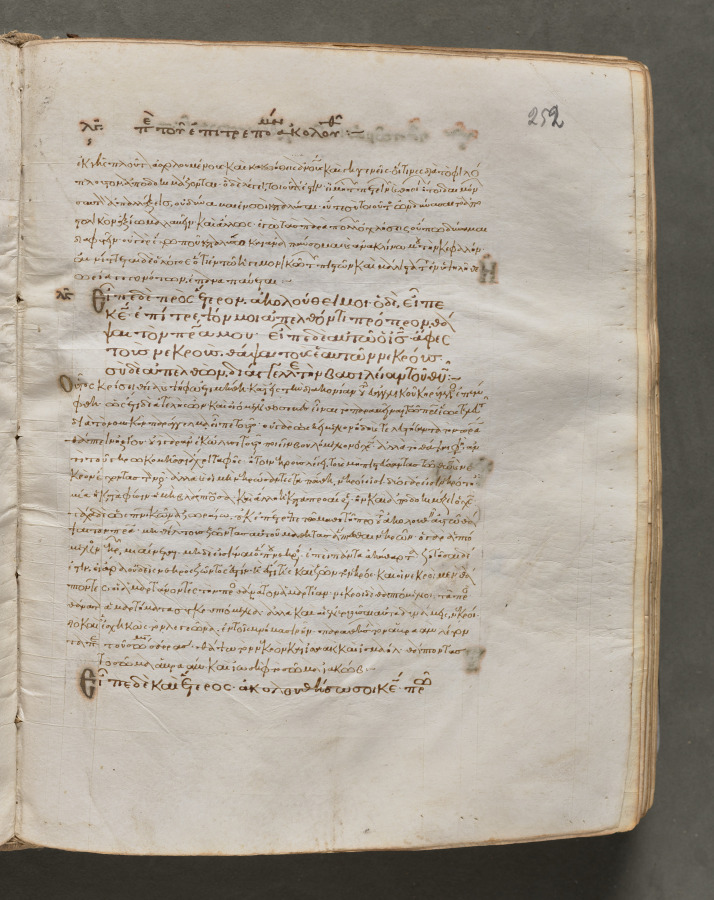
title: Text, folio 252 (recto), from a Gospel Book with Commentaries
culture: Byzantium, Constantinople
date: c. 1000–1100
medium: ink, tempera, and gold on vellum; leather binding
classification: Bound Volume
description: Each of the four gospels in this book opens on a page with brilliantly illuminated borders depicting the author of the text as well as birds—principally peacocks, symbols of the immortality of the soul—and fountains, representing the fountain of life and the salvation of the soul. This volume consists of 428 leaves with texts in Greek. Its level of sophistication suggests that it was probably written and decorated in a monastery in Constantinople.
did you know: Gospel books were carried in procession through Byzantine churches.